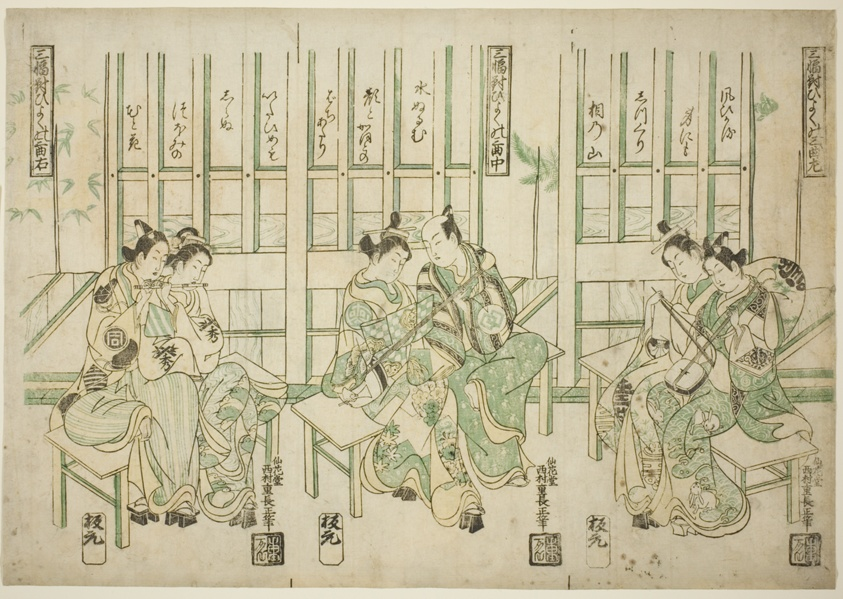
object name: Print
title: Set of Three, Love Birds in Three Kinds of Music (Sampukutsui hiyoku no san kyoku)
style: Japanese (culture or style)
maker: Nishimura Shigenaga (Japanese, 1697 (?)-1756)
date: c. 1748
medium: Color woodblock print; uncut hosoban triptych, benizuri-e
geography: Japan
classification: woodblock print; print; asian art